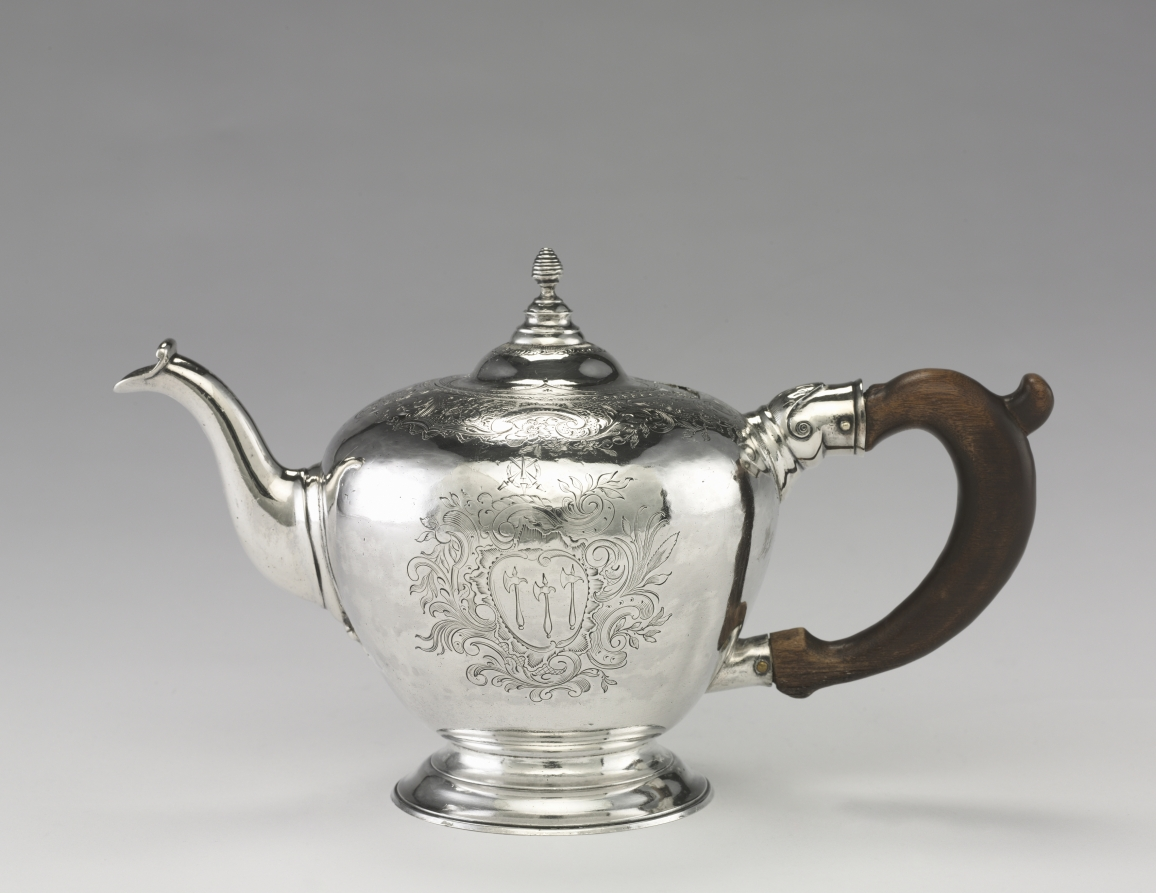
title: Teapot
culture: America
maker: Nathaniel Hurd (American, 1730–1778)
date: c. 1755–60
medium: Silver, Wood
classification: Silver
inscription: engraved: coat of arms of Gibbs on side.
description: This teapot not only demonstrates Hurd's mastery of the art of forging silver, but of engraving it as well. The design for the coat of arms of the Gibbs family incised on this teapot was probably taken from Guillim's Display of Heraldry, published in 1724. In Hurd's portrait by Copley the words "Display of Heraldry/J. Guillim" are visible on the spine of the large book shown at the sitter's elbow.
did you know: The master silversmith Nathaniel Hurd, whose portrait hangs nearby, made this teapot engraved with the crest of the family that commissioned it. Tea was a precious commodity in Colonial America and this silver piece would have held a place of honor at the owner's tea table.